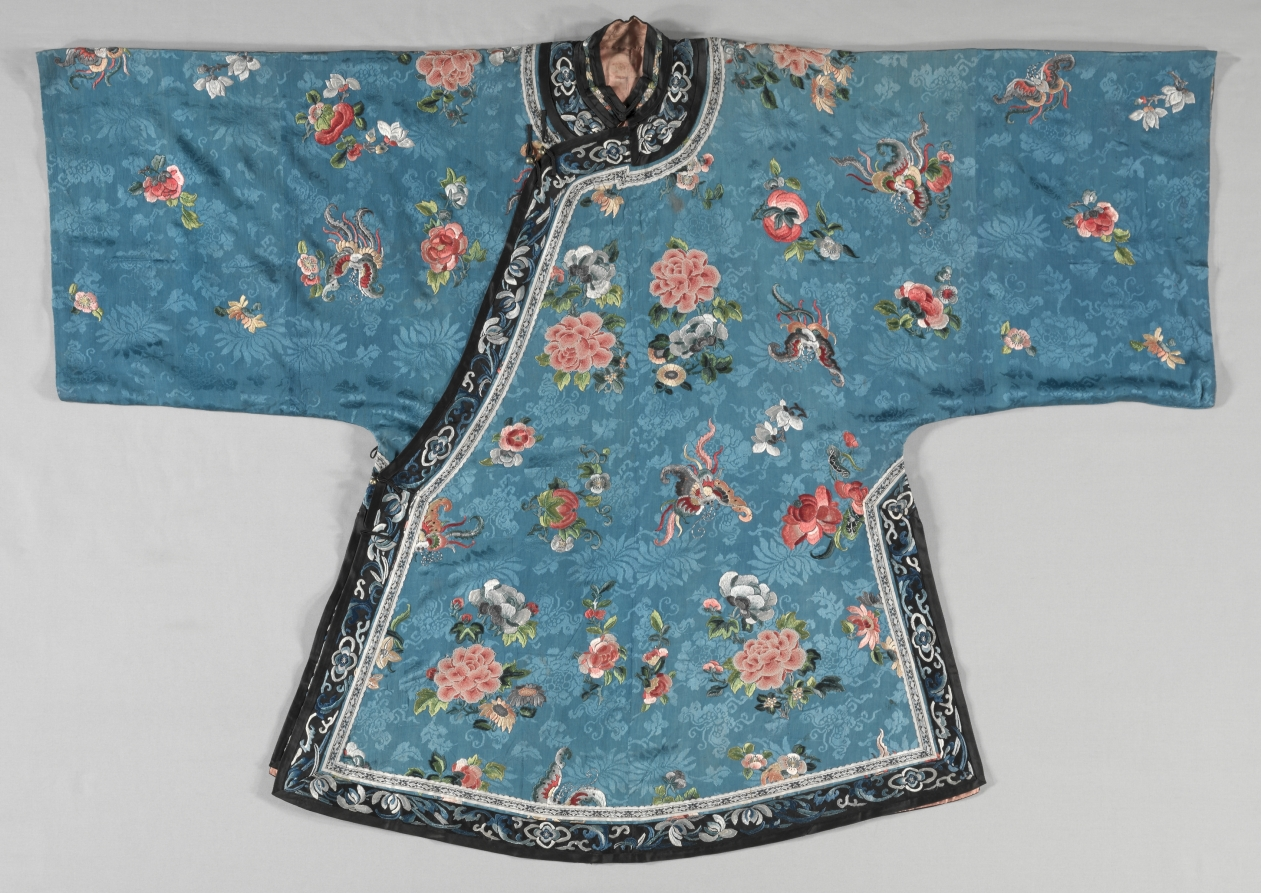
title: Han Woman's Jacket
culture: China, Qing dynasty (1644–1911)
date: 1880s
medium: Silk: embroidery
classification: Garment